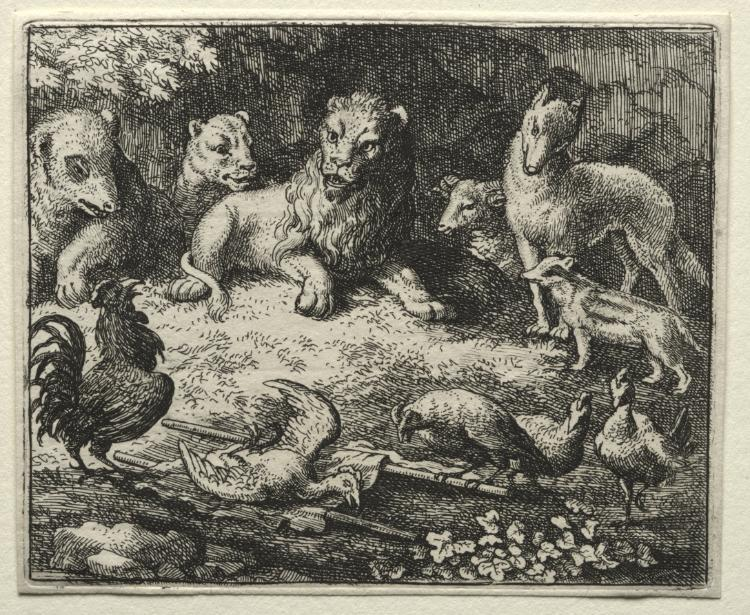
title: Reynard the Fox: The Complaint of the Cock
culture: Netherlands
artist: Allart van Everdingen (Dutch, 1621–1675)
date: 1650–75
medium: etching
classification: Print